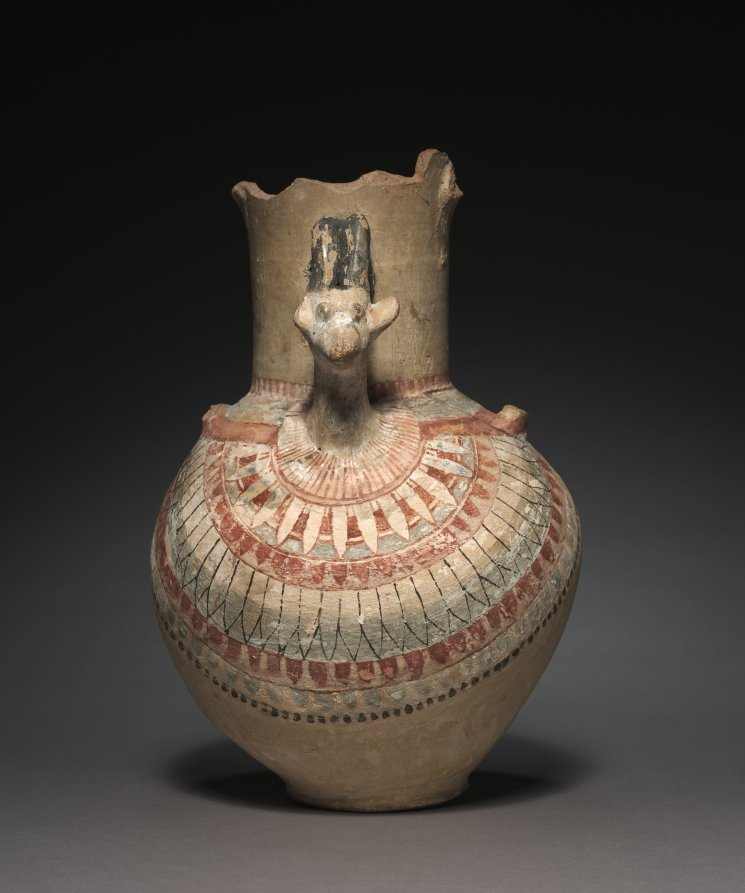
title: Decorated Amphora with Ibex Head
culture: Egypt, Modern pastiche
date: before 1920 this is common era, not BCE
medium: marl clay ware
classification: Vessels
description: A splendid example of the decorated pottery known as "palace ware," made only in Dynasty XVIII. It is painted with garlands imitating the real flowers with which vessels were draped at banquets. This vase was found in the palace of Amenhotep III at southern Thebes.